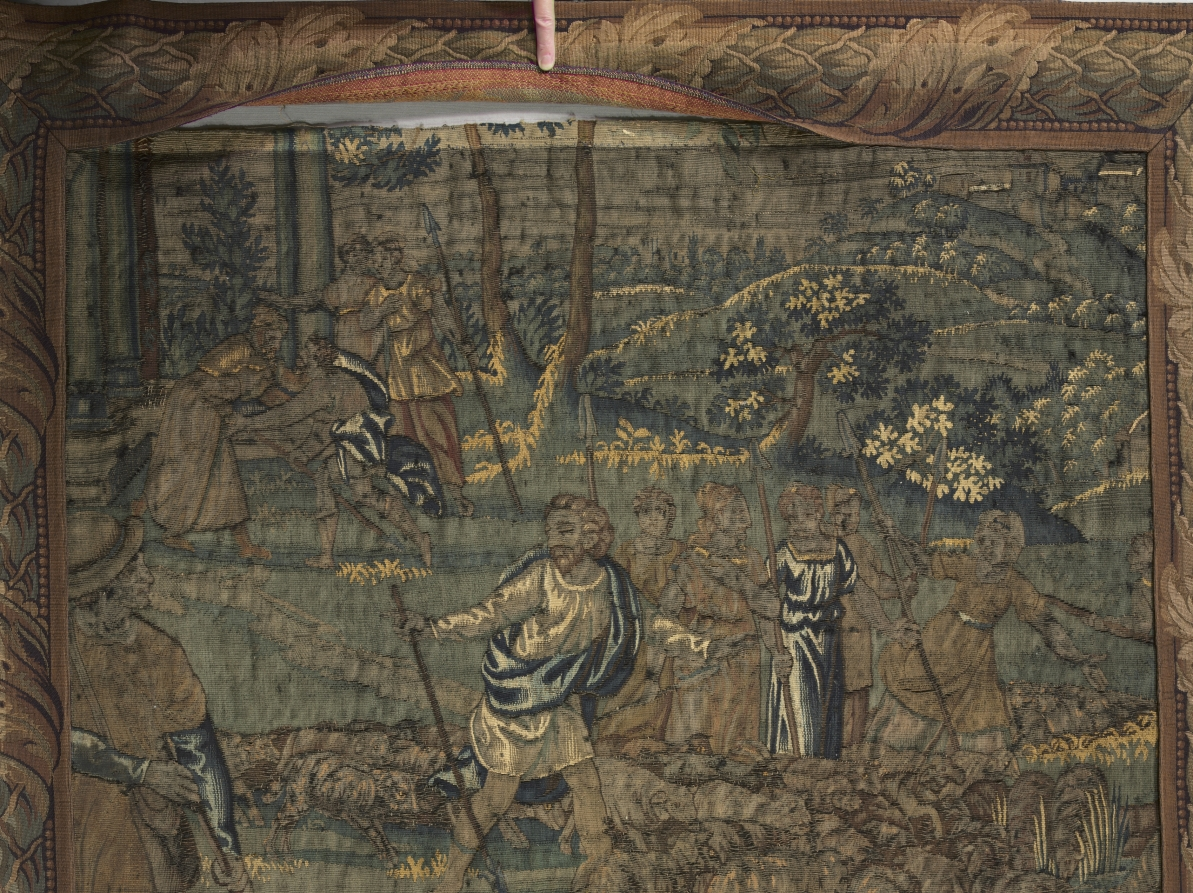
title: Moses and Jethro's Daughter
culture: Flanders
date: 1600s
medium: Wool: tapestry weave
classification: Tapestry